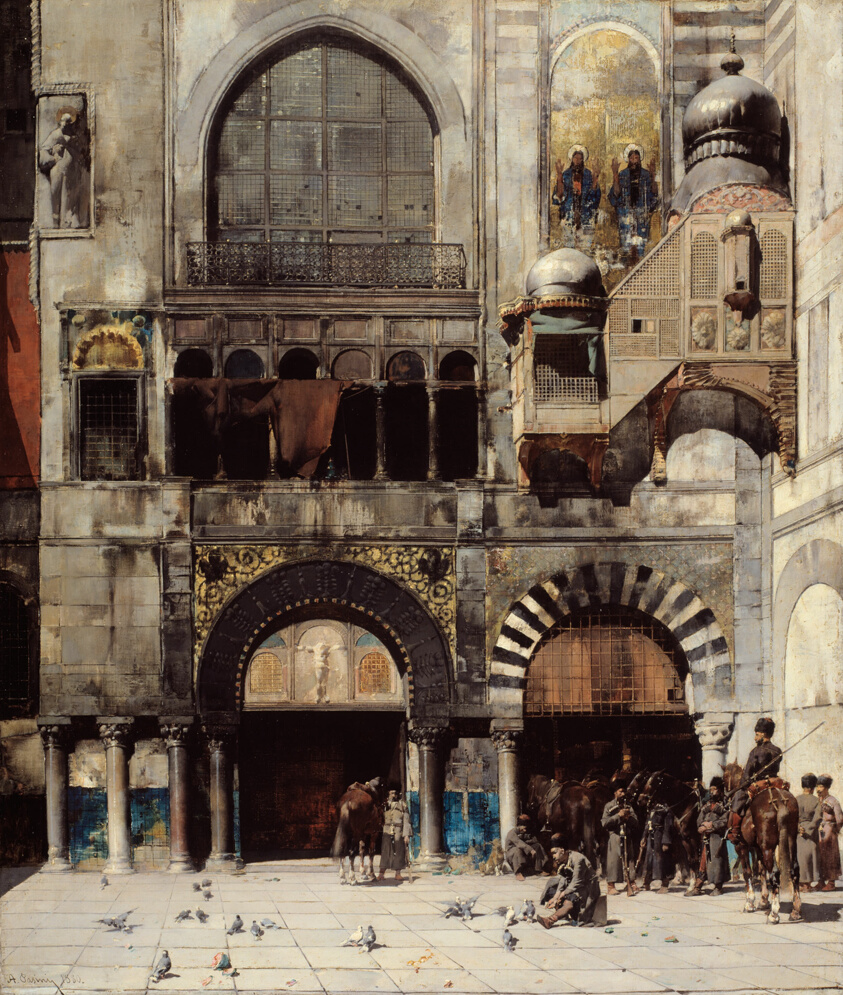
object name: Painting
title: Circassian Cavalry Awaiting their Commanding Officer at the Door of a Byzantine Monument; Memory of the Orient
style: nineteenth century, romantic, 19th century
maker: Alberto Pasini (Italian, 1826-1899)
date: 1880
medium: Oil on canvas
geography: Italy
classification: painting; paint; oil paintings (visual works); oil on canvas; Italian; european painting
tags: architecture, architechture, architecture, figures, arches, sculpture, animals, horse, soldiers, men, birds, horses, mosaic, dome, textile, guns, weapons